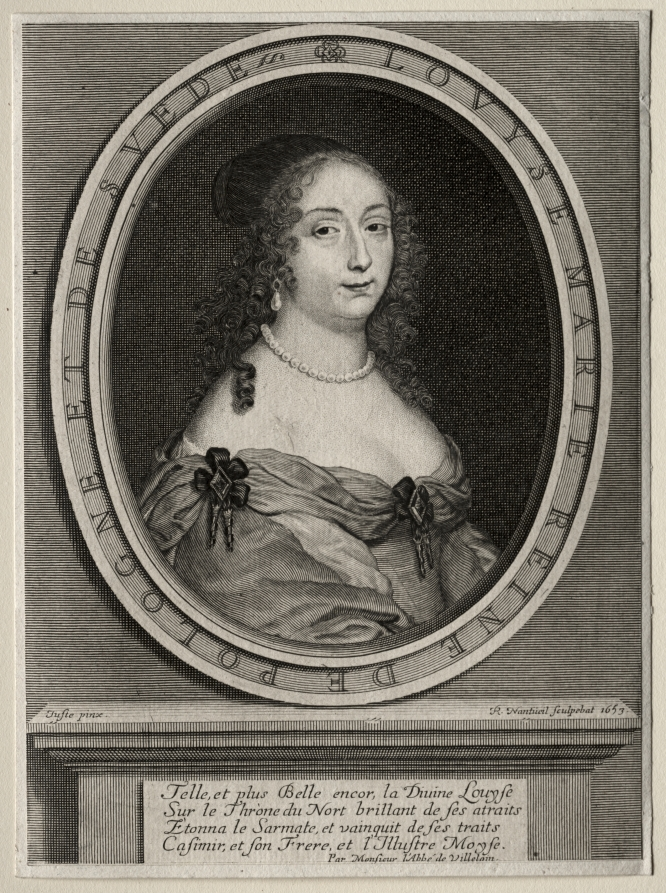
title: Marie Louise de Gonzague, Reine de Pologne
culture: France, 17th century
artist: Robert Nanteuil (French, 1623–1678)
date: 1653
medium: engraving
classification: Print